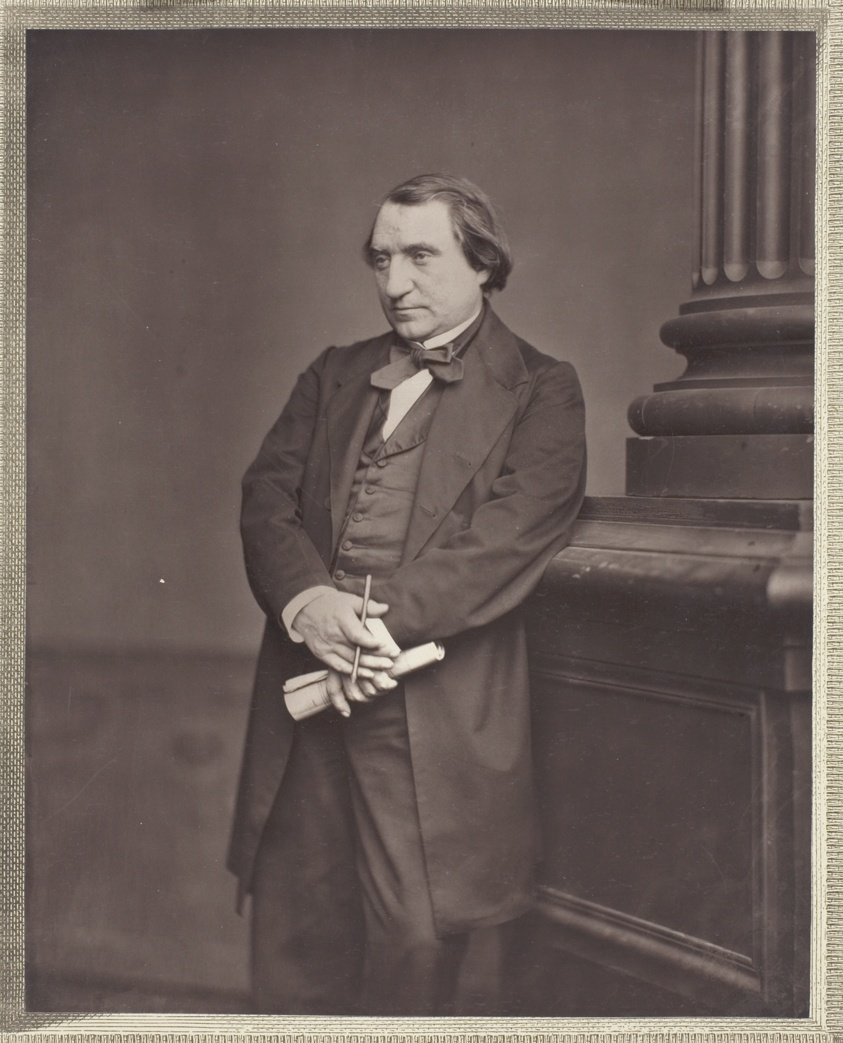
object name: Photograph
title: Renan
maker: Antoine Samuel Adam-Salomon (French, 1811–1881)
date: c. 1976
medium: Woodburytype, from the periodical “Galerie Contemporaine Littéraire, Artistique” (1876), volume 3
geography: France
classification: woodburytype; photomechanical process; photography; photograph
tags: Collected by Hugh Edwards, Contemporaine Littéraire